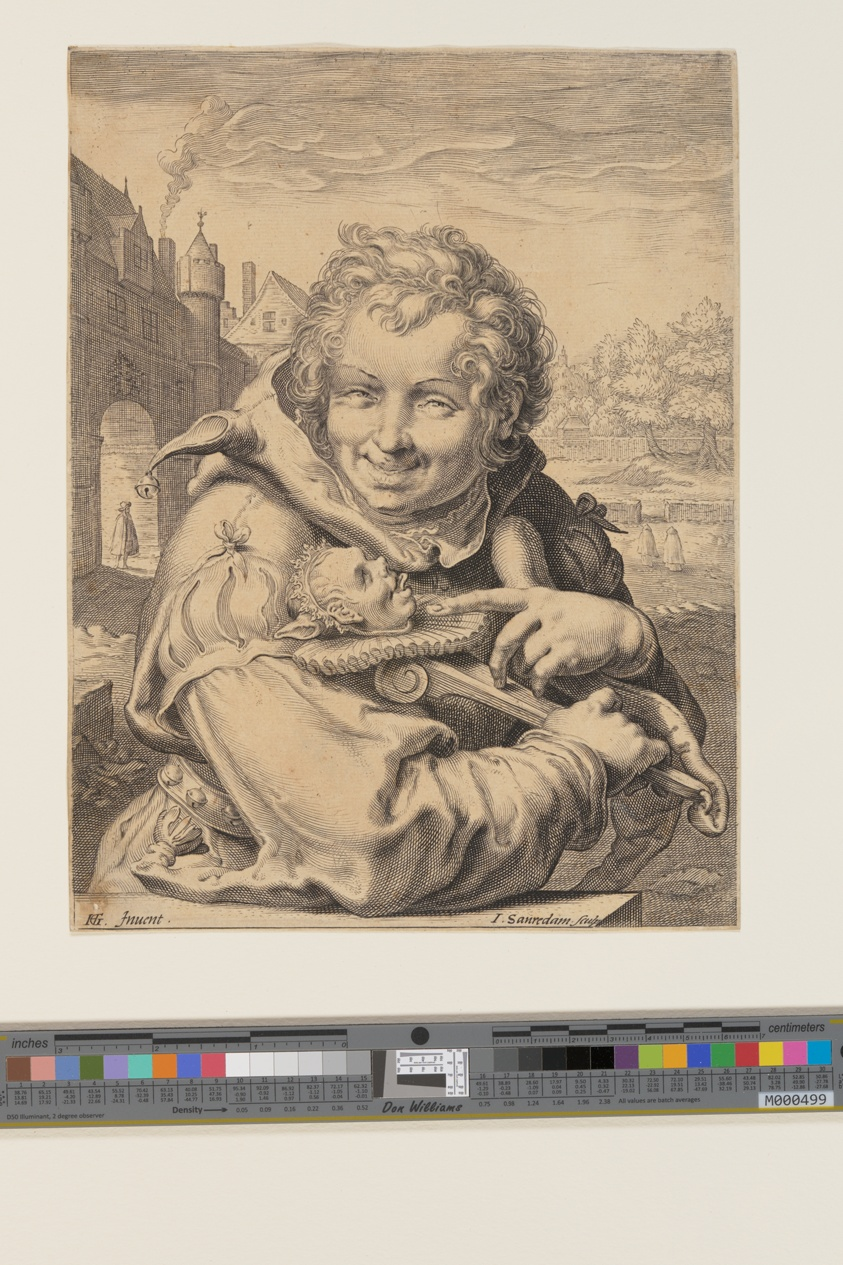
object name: Print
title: Fool Holding a Staff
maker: Jan Saenredam (Dutch, 1565–1607); after Hendrick Goltzius (Dutch, 1558–1617)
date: c. 1595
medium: Engraving on ivory laid paper, discoloured to cream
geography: Netherlands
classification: engraving; paper; print; prints and drawing